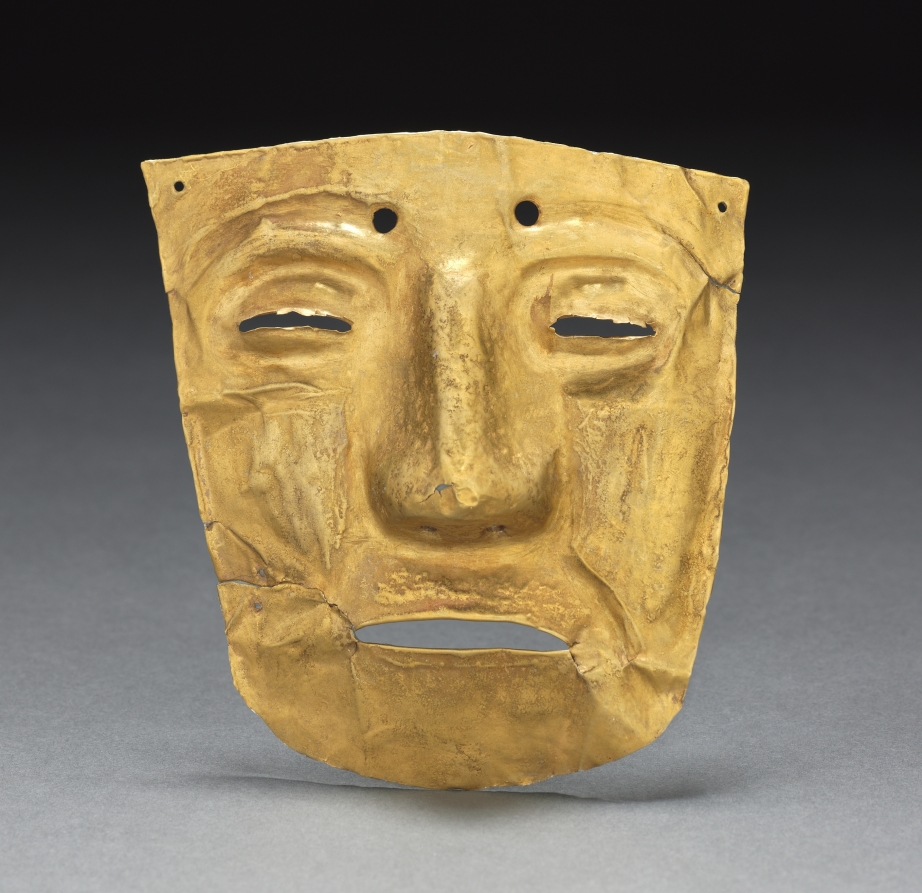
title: Mask Ornament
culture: Southern Costa Rica, (Rio Grande de Térraba, Diquís Region), Diquís Style, 8th-16th Century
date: c. 700–1550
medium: hammered and cut gold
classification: Metalwork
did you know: Panning for gold was viewed as a sacred activity among the ancient inhabitants of Costa Rica and Panama.